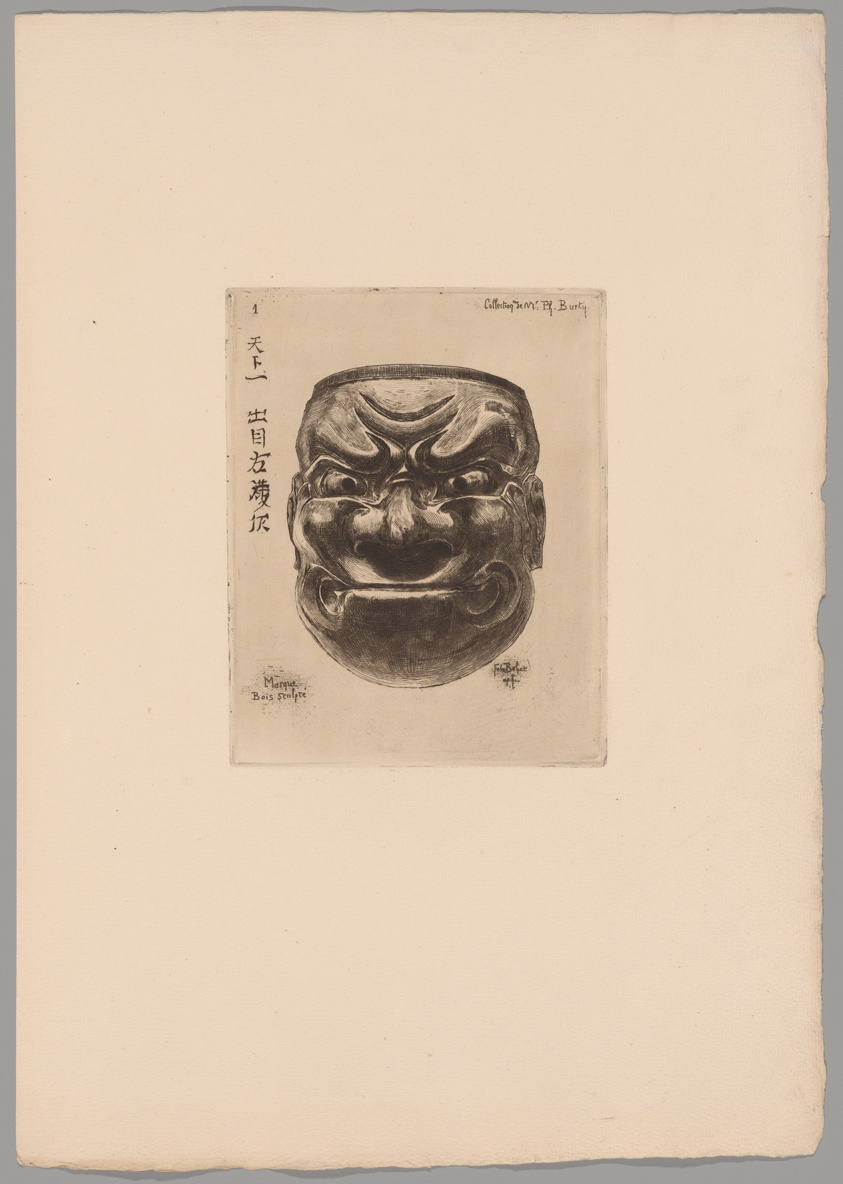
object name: Print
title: Japonisme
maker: Felix Hilaire Buhot; French, 1847-1898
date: 1883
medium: Etching in brownish-black ink on cream laid paper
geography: France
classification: prints and drawing; etching; paper; print